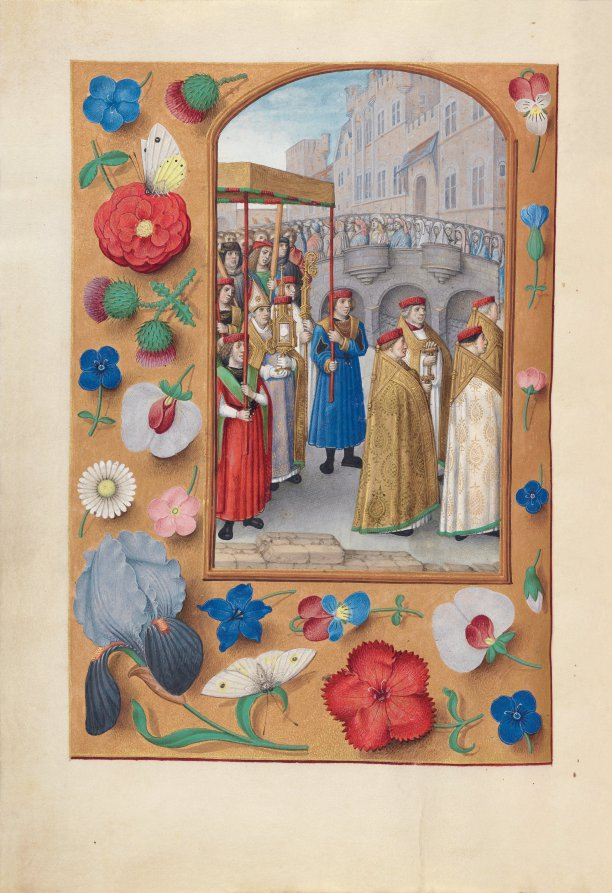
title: Hours of Queen Isabella the Catholic, Queen of Spain: Fol. 43v, Procession of the Sacrament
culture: Flanders, Ghent and Bruges, late 15th century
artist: Master of the First Prayerbook of Maximillian (Flemish, c. 1444–1519)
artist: and Associates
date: c. 1500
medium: ink, tempera, and gold on vellum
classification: Bound Volume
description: This manuscript was illuminated by a circle of at least five highly organized manuscript painters active in the Flemish cities of Ghent and Bruges. The principal illuminator was Alexander Bening, who painted the majority of the book's miniatures. Manuscripts produced by this circle of artists are renowned for the decoration of their borders, which typically feature a rich variety of realistically-painted flowers, birds, and butterflies. This prayer book, called a book of hours, was intended not for a cleric, but for the private devotions of a lay person-in this case, Isabella the Catholic, Queen of Spain (1451-1504). Isabella's coat of arms embellishes the book's frontispiece. It is unlikely that the book was commissioned by the Queen herself; rather, she probably received it as a diplomatic gift from someone courting her patronage, perhaps Cardinal Francisco Jimenez de Cisneros. A Franciscan friar, Jimenez was dependent upon Isabella for his advancement, first to the post of Queen's confessor in 1492, and then to Archbishop of Toledo in 1495.